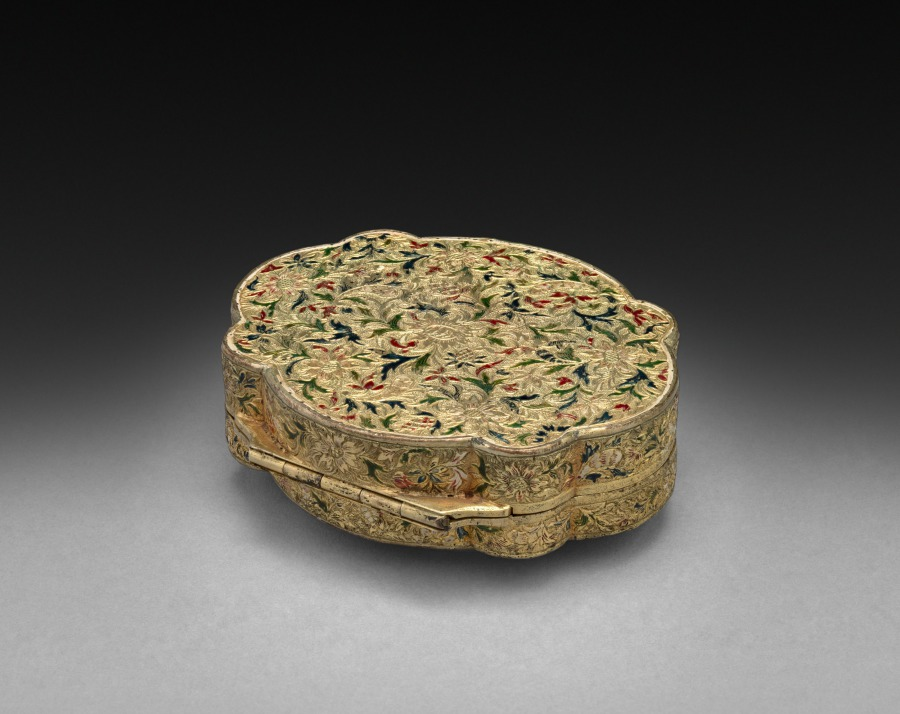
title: Box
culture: China, Qing dynasty (1644-1911) or Republican period (1912-49)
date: 1900–1916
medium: gilt and enamel with with jade medallion in cover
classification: Enamel